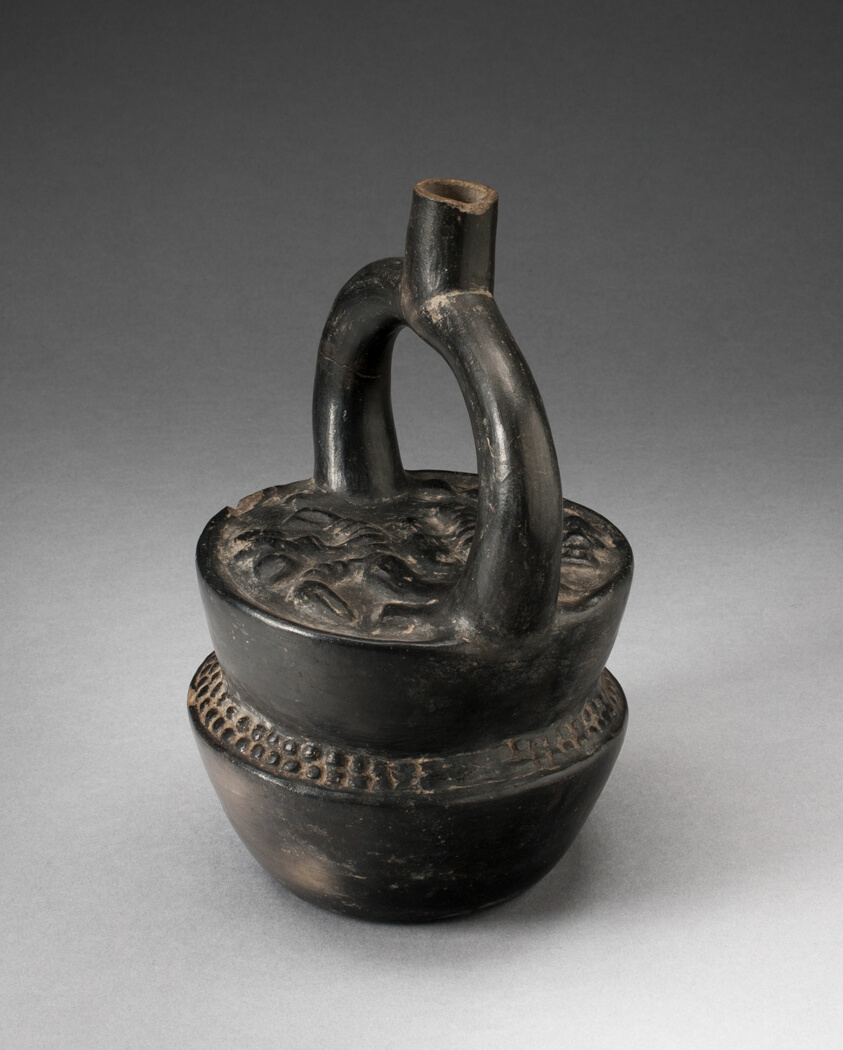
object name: Vessel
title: Stirrup Spout Vessel in Form of Stacked Bowls of Food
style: moche, Arts of the Americas, andes, south american, andean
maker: Moche (North coast, Peru)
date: 100 BCE–500 CE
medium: Ceramic and pigment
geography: Peruvian North Coast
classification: blackware (black basaltes); earthenware; ceramics; vessel; art of the americas